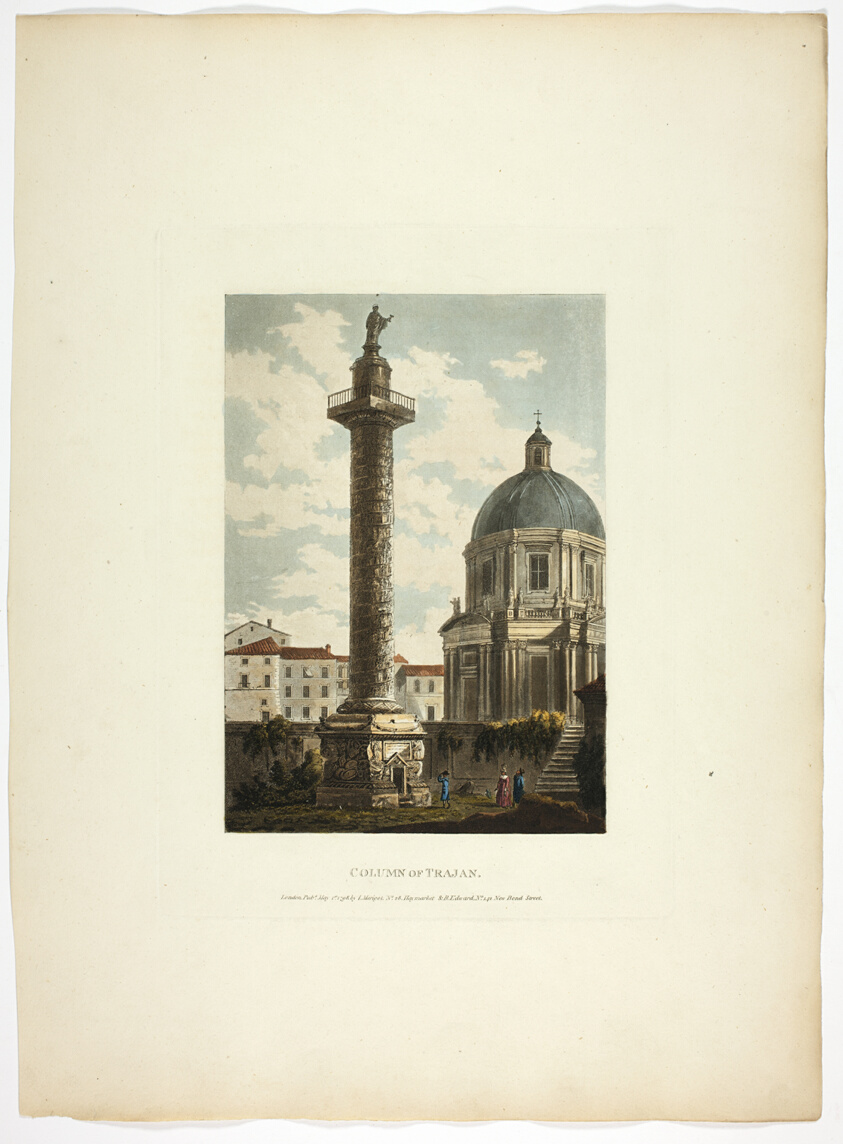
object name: Print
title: Column of Trajan, plate twenty-one from Ruins of Rome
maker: M. Dubourg, (English, active 1786-1838); published by J. Merigot (Italian, Unknown)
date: published May 1st, 1798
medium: Hand-colored aquatint on paper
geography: England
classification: aquatint; print; prints and drawing